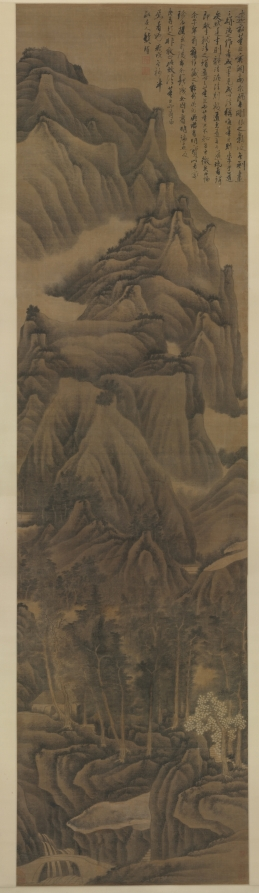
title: Landscape in the Style of Dong Yuan and Juran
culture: China, Qing dynasty (1644-1911)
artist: Gong Xian (Chinese, 1599–1689)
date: c. 1650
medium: hanging scroll, ink with white pigment on silk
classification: Painting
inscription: 畫家董巨，實開南宗。既無剛根之氣，復無刻畫之跡。後之作者或以才見，或以法稱。唯董巨則幾乎道矣。然逞才則離法，泥法則叛道。至道無可道。說者謂即歛才就法之謂道。問之董巨，而董巨不知，忽乎微矣。此幅余二十年前舊作。藏之新安吳氏。吳君晉明寶之若家珍。後携之金陵。命余題識。余因與晉明論畫及此，并紀之。非敢曰此效法董巨而有得焉者也。 庚戌冬杪半畝居人龔賢。 [印]龔半千; 野遺賢; [左下]龔賢; [上]可能另有龔賢一印。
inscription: 2 additional seals of Cheng Qi 程琦 (1911–1988)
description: Towering peaks and unfolding ranges are piled up and overlaid with layer after layer of brushwork to give an overall dense, dark, and even melancholic effect. Gong Xian created a personal style of landscape, which departed greatly from his models Dong Yuan and Juran. The tension between tradition and individuality had been a topic of interest for the Chinese artist. As Gong Xian writes in his inscription: "Painters of later periods may be known for their natural talents or praised for their observance of established traditions. . . . However, those who indulge in showing off their talent will deviate from the tradition, while those who adhere to tradition will alienate themselves from the Dao. The supreme Dao is inexplicable in words. . . ."